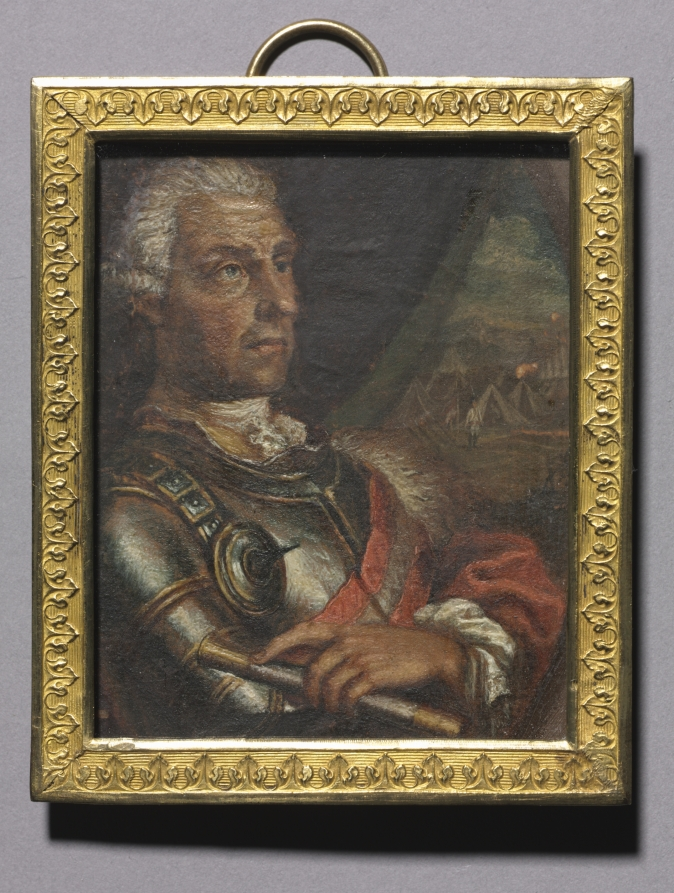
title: Portrait of Baron Ernst Gideon Freiherr von Laudon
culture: Russia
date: 1800s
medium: oil on paper mounted on wood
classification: Portrait Miniature